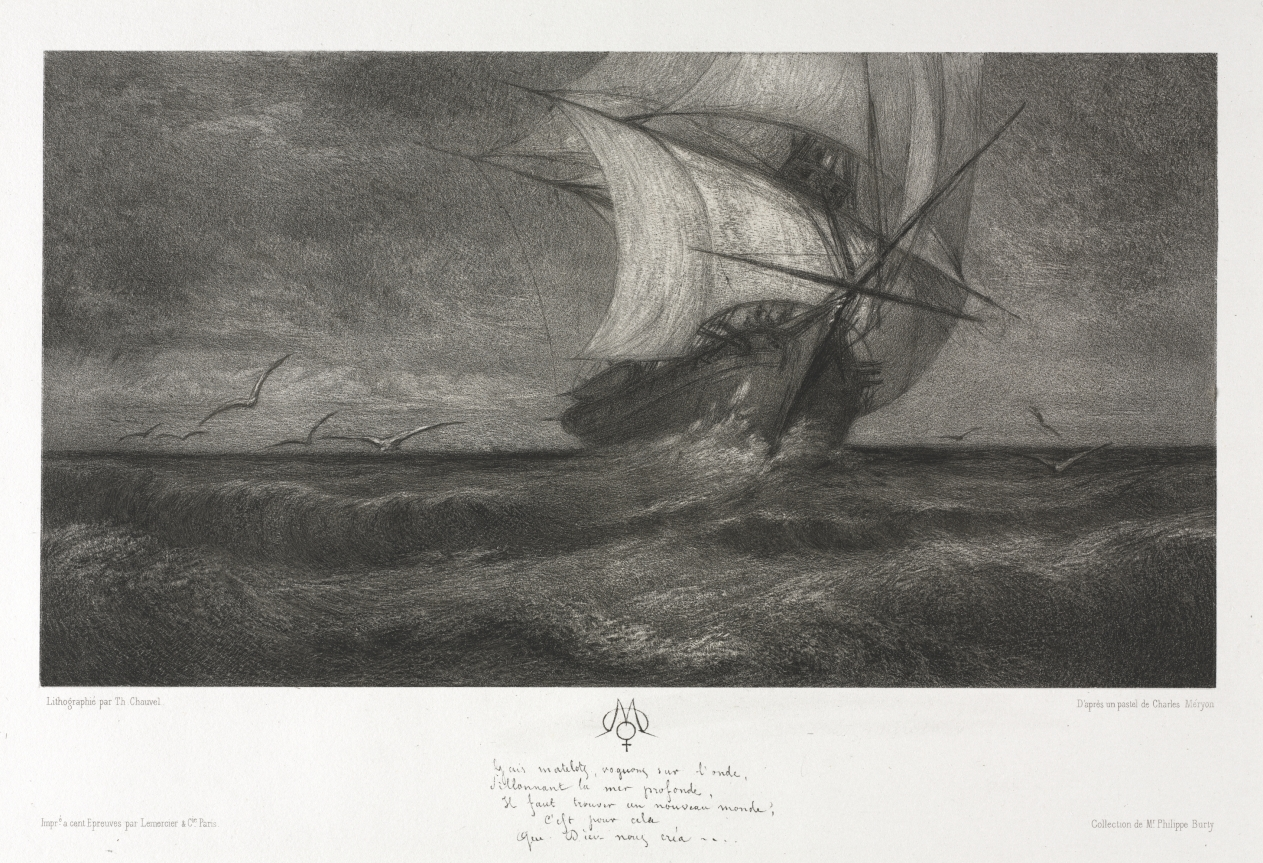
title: The Phantom Ship, or On the Waves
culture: France, 19th century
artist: Theophile Narcisse Chauvel (French, 1831–1909)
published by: Lemercier & Cie.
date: 1872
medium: lithograph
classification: Print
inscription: lower left, printed: "Lithographie par Th. Chauvel; Impré a cent Epreuves par Lemercier & Cie. Paris"; lower right, printed: "D'apres un pastel de Charles Méryon; Collection de Mr. Philippe Burty"